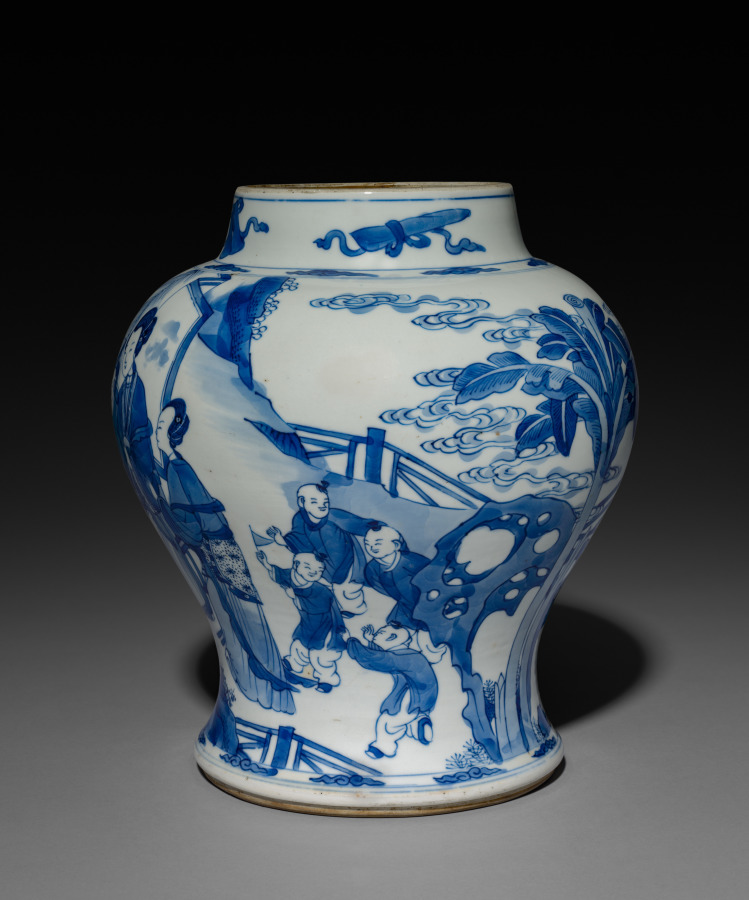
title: Vase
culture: China, Qing dynasty (1644–1911), Qianlong reign (1736–95)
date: 1736–95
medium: porcelain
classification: Ceramic